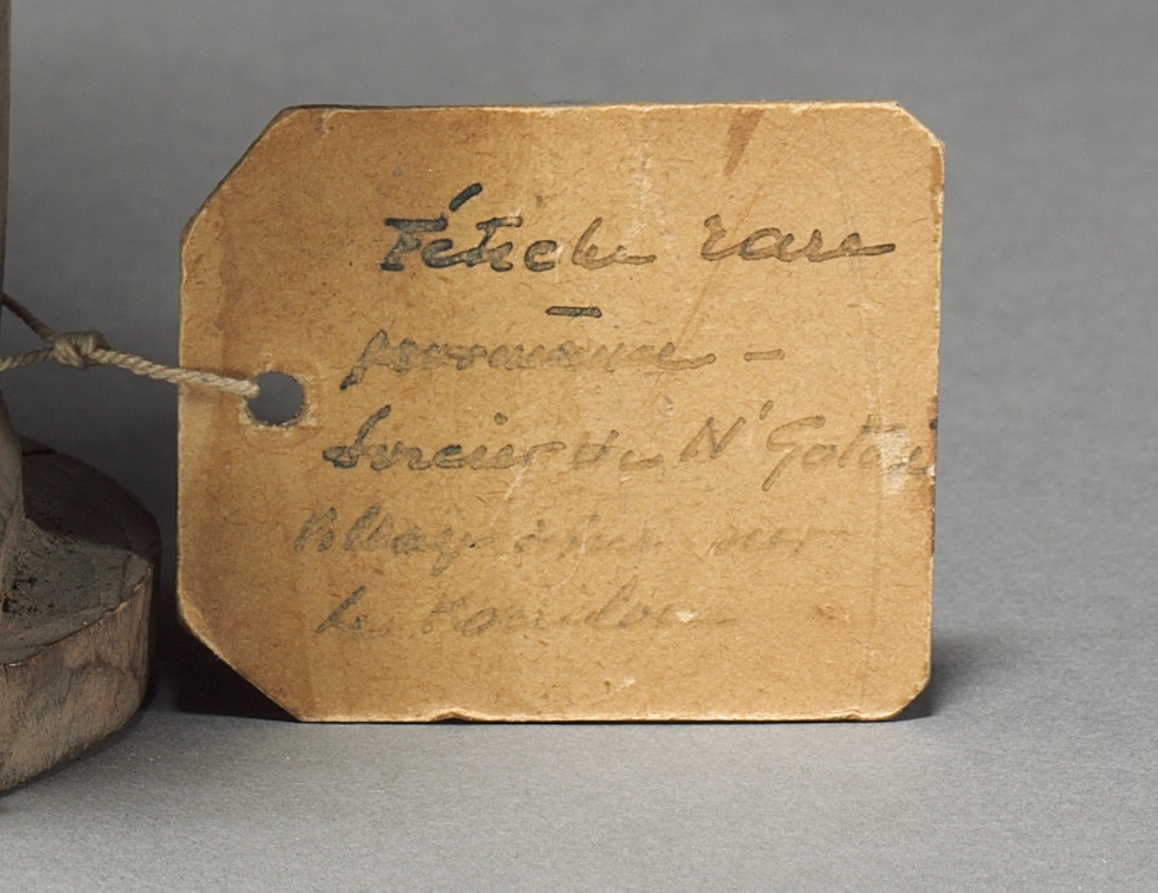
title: Power figure (nkisi)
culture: Africa, Central Africa, Republic of the Congo, Kongo-style maker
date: late 1800s–early 1900s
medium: Wood, organic materials (including resin), cloth, metalized glass, possibly porcelain, and plant fiber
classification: Sculpture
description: This figure is one of the two tallest of the seven anthropomorphic minkisi figurines previously in the Delenne collection. Identified as an nduda, two upward “guns” are attached on its side loaded with gunpowder used to shoot witches. Its label bears the word colique, a term referring to heavy pains caused by intestinal obstruction.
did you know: The object’s two small guns are pointing upward, but bears the label “colique,” a term referring to heavy pains caused by intestinal obstruction.